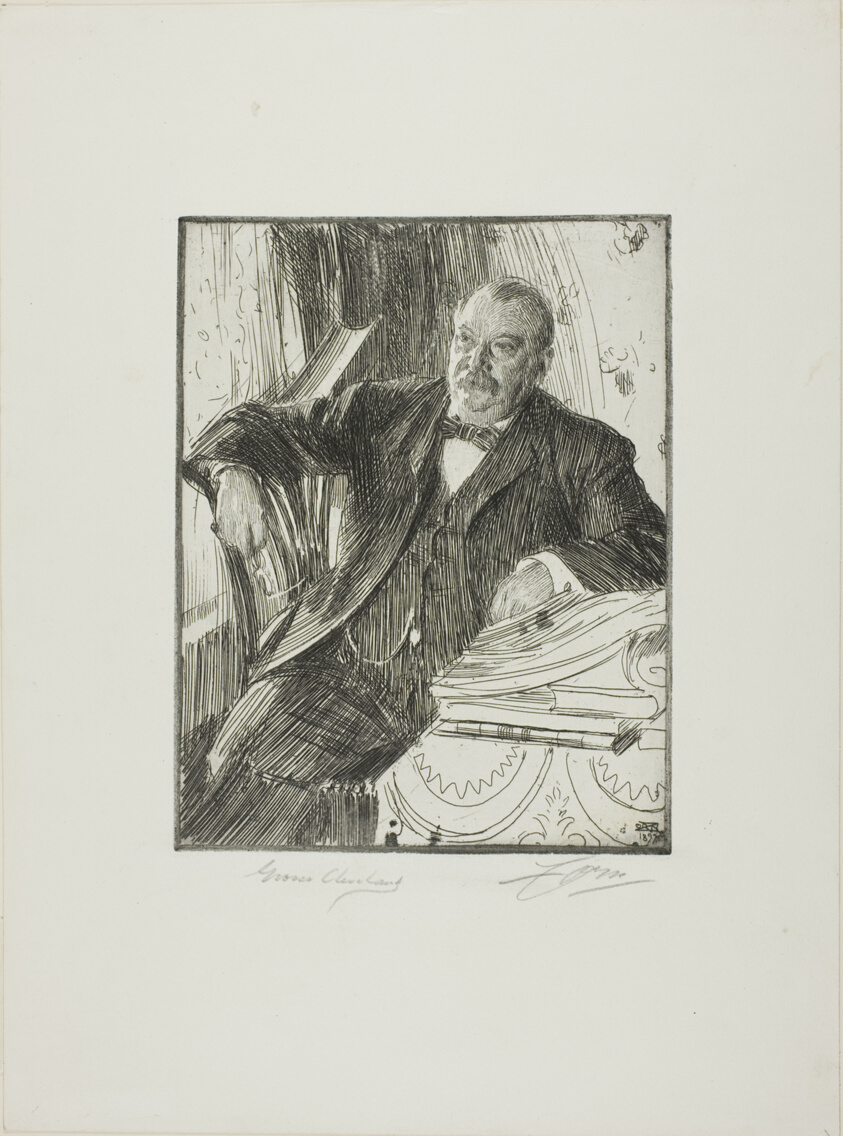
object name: Print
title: Grover Cleveland II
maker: Anders Zorn (Swedish, 1860-1920)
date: 1899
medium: Etching on white wove paper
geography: Sweden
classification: etching; print; prints and drawing